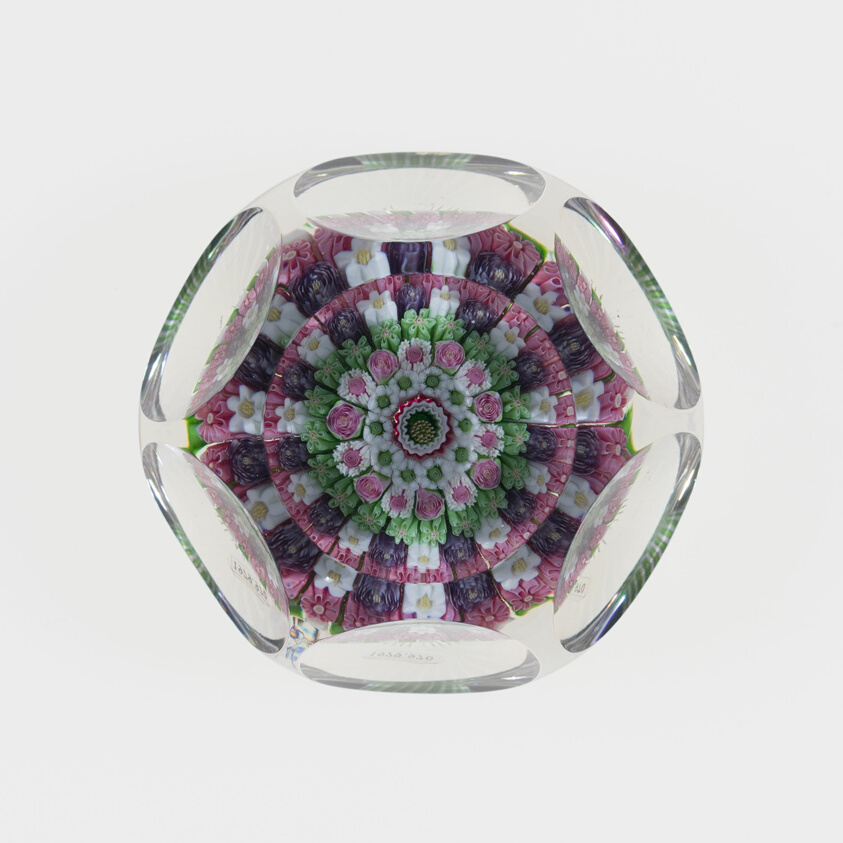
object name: Glass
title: Paperweight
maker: Clichy Glassworks (Cristalleries de Clichy); Clichy, France, 1837-1885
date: c. 1845–55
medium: Glass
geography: Clichy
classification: paperweight; millefiori; european decorative arts; glass